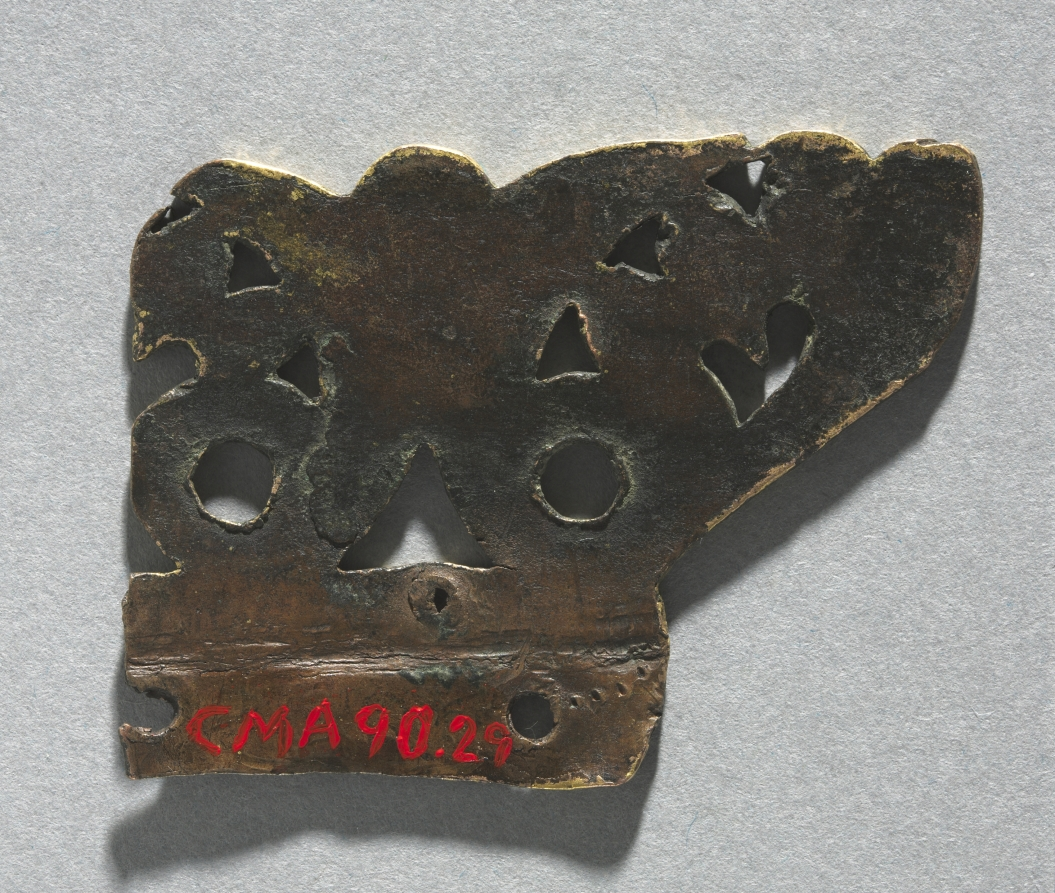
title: Fragment of an Ornamental Crest from a Reliquary Shrine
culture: Mosan, Meuse Valley, Maastricht?, Gothic period, 12th century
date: c. 1165–1180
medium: gilded copper, émail brun (brown enamel)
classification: Metalwork